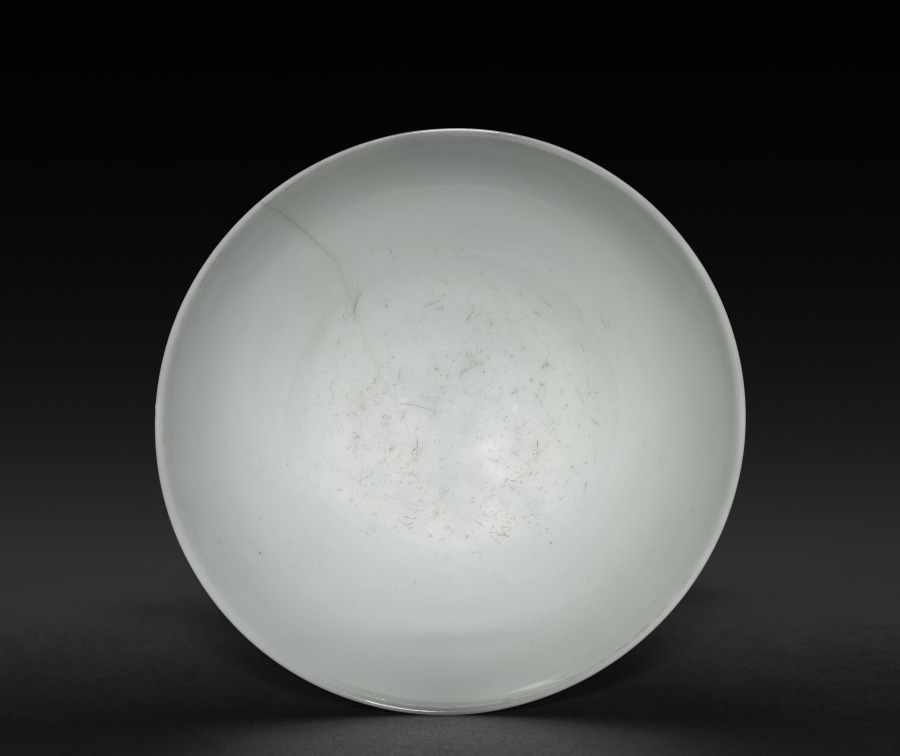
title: Wine Cup with Monochrome Red Glaze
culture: China, Jiangxi province, Jingdezhen kilns, Qing dynasty (1644-1911), Yongzheng mark and reign (1723-35)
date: 1723–35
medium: porcelain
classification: Ceramic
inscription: 大清雍正年制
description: In the Qing dynasty (1644–1911), luxury items became more affordable to larger parts of the society, including women, merchants, and literati in non-official positions. Imperial patronage and a growing urban population encouraged consumption of luxury goods and local craftmanship. This wine cup has a coral glaze on outside and a transparent glaze of white eggshell porcelain on the inside. It exemplifies Qing dynasty accomplishments in porcelain techniques and the creative mind of talented artisans who sought clients on a competitive market.